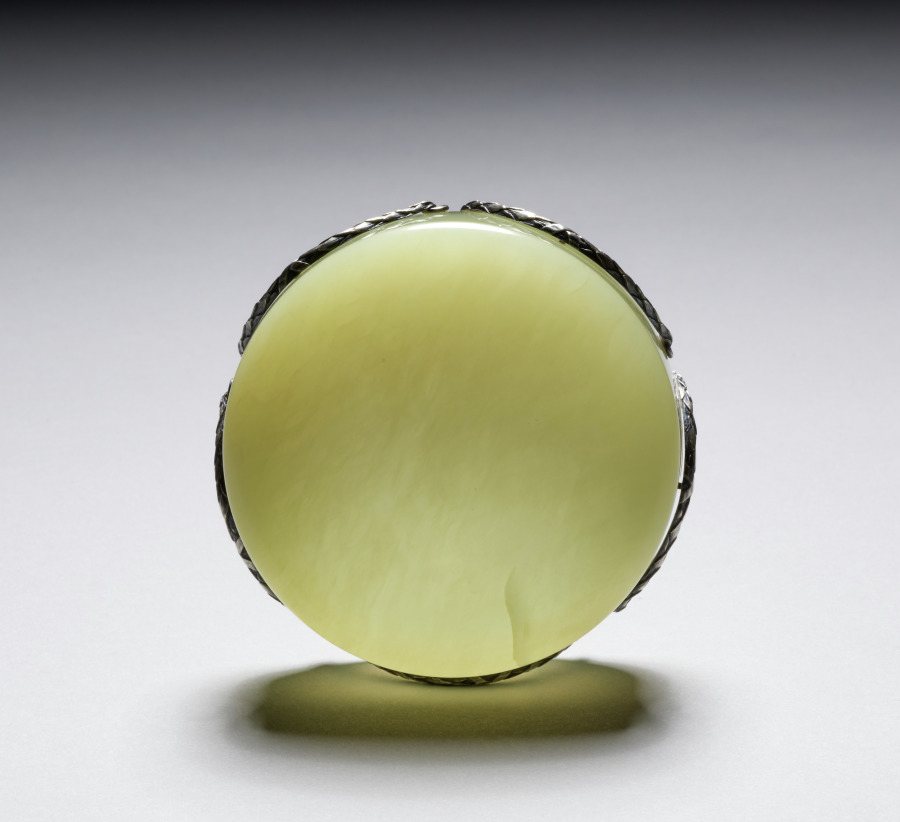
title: Dish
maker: House of Fabergé (Russian, 1842–1918)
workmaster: Hjalmar Armfelt (Finnish, 1873–1959)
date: c. 1904–16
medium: bowenite, silver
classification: Silver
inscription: Impressed mark: 88, silver standard; initials for workmaster Karl Gustav Hjalmar Armfelt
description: The House of Fabergé specialized in the creation of little treasures intended as opulent personal gifts. In creating luxurious accessories for a desk or tabletop, Fabergé often used native hardstones such as multicolored agate and quartz, green nephrite, pink rhodonite, rock crystal, and pale green bowenite found in the Ural Mountains of western Russia. Fabergé's designers often paired hardstones with silver mounts, particularly in the Moscow workshop where the company's silversmiths were concentrated.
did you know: Sometimes called "new jade," bowenite is actually considered a semiprecious gemstone. Though Fabergé obtained his supply from the Ural Mountains of Russia, bowenite is also the state mineral of Rhode Island.